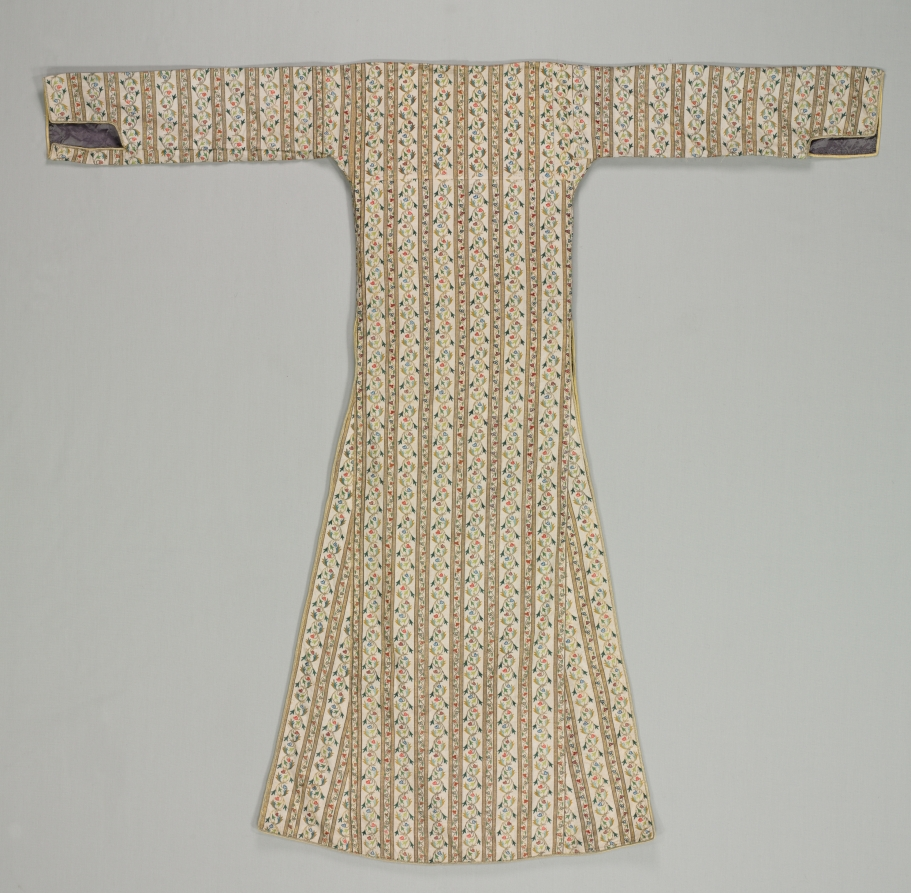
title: Woman's robe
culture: Turkey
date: 1800s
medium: striped fabric; plain weave: silk; embroidery, chain stitch: silk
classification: Garment